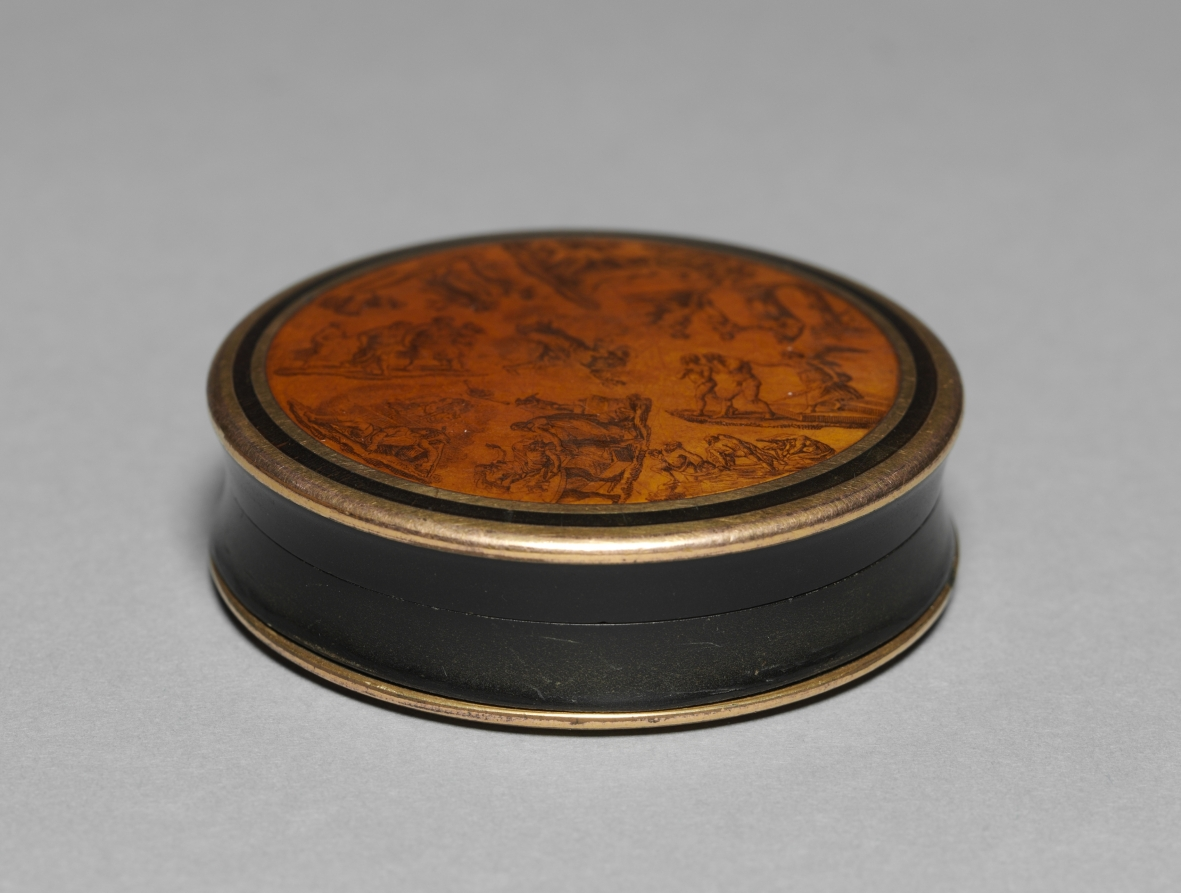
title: Snuff Box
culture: Italy, late 18th century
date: late 1700s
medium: horn mounted in gold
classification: Miscellaneous